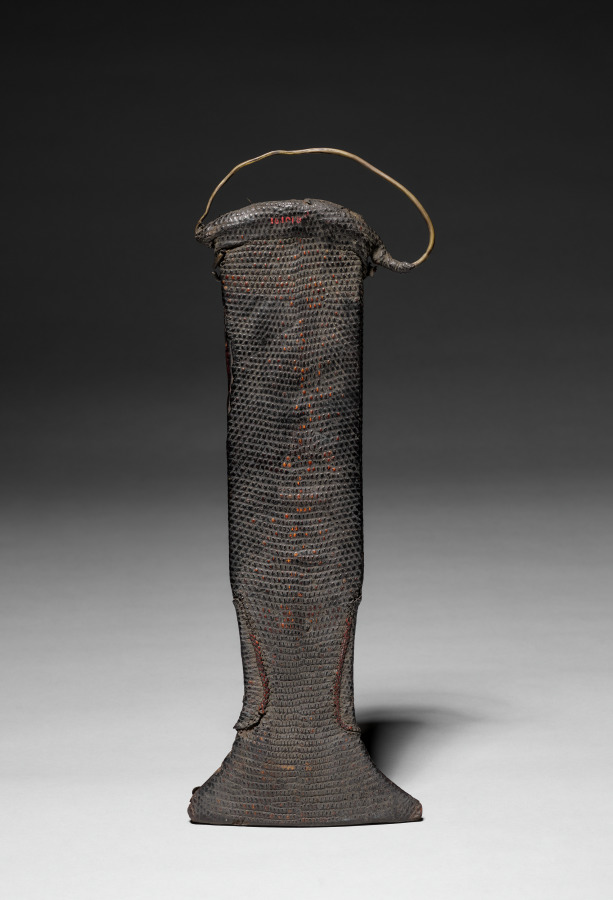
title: Sheath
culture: Africa, Central Africa, Democratic Republic of Congo, unknown maker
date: 1800s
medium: Reptile skin and copper alloy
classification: Arms and Armor